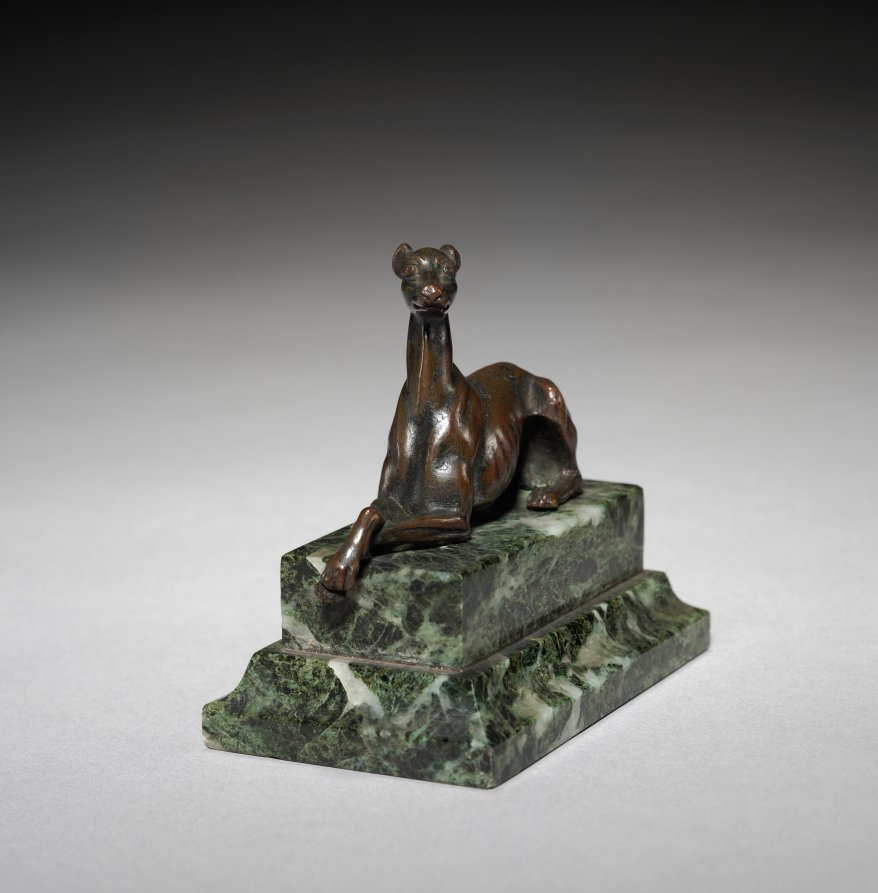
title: Whippet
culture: France, 19th century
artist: Pierre Jules Mène (French, 1810–1879)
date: c. 1825 – 1879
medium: bronze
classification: Sculpture